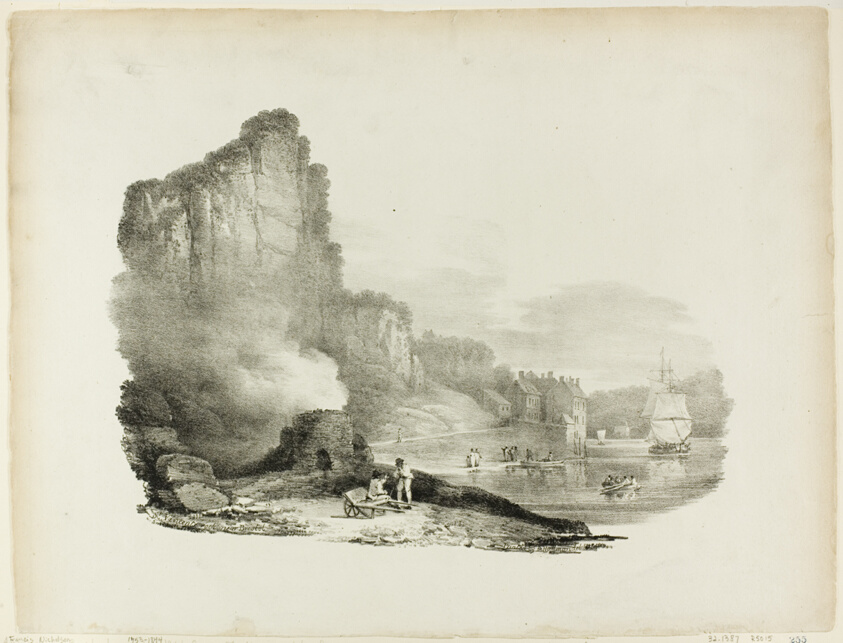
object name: Print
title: S.E. Vincent's Rock near Bristol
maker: Charles Joseph Hullmandel (English, 1789-1850); after Francis Nicholson (British, 1753-1844)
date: 1821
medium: Lithograph on paper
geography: England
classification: lithograph; print; prints and drawing